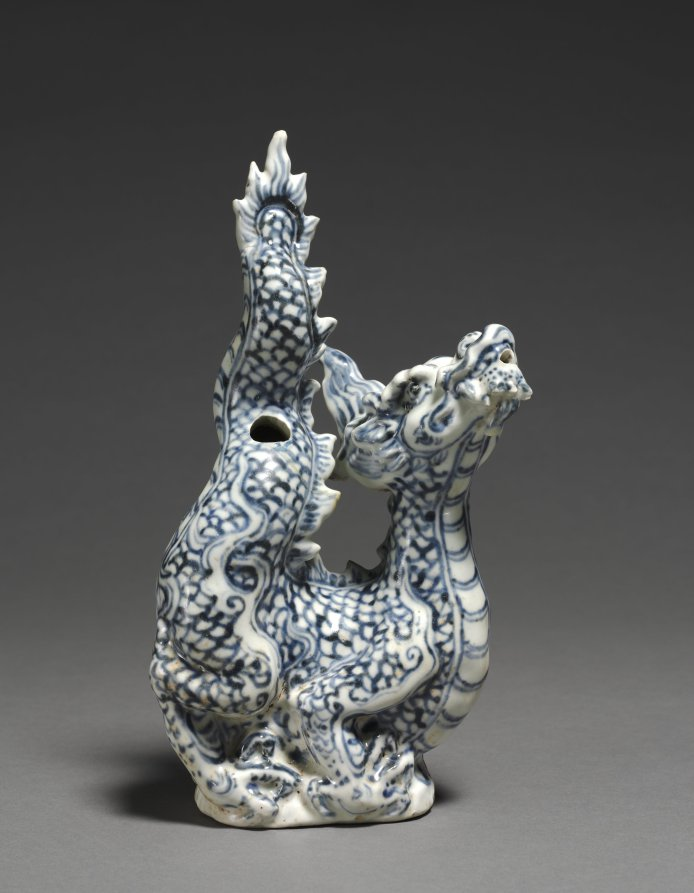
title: Ewer in the Shape of a Dragon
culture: Vietnam (Annam)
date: 1400s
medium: porcelain with underglaze blue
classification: Ceramic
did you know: This dragon-shaped vessel was tilled through a hole in the tail and emptied through the dragon's mouth.